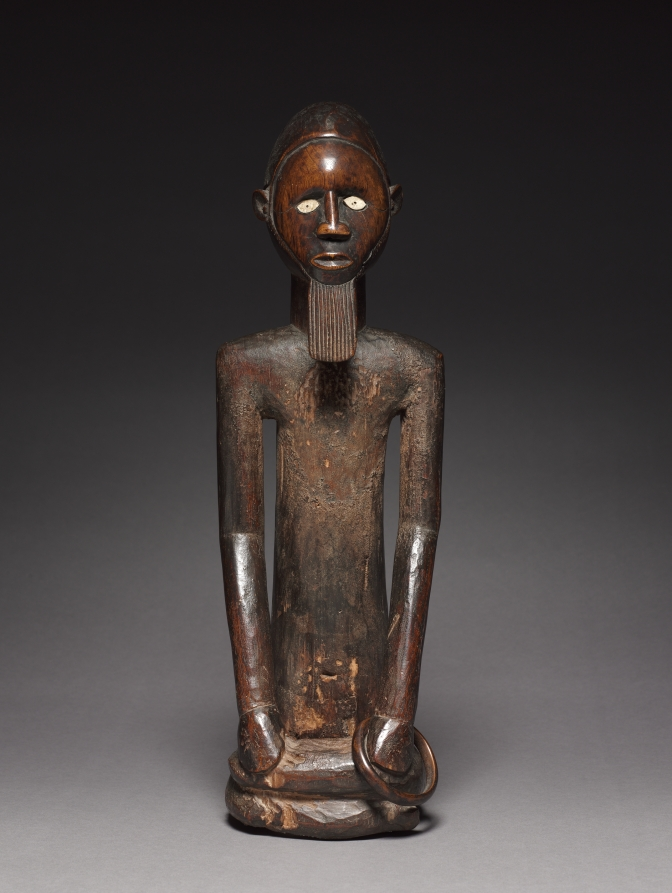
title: Male Figure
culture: Africa, Central Africa, Republic of the Congo, Beembe-style maker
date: late 1800s-early 1900s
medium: Wood, ceramic or Formica, copper alloy, and iron alloy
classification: Sculpture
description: This sculpture played a role in ancestral worship among the Beembe people. Ancestors are held in high regard among the Beembe, and this figure is thought to represent an idealized form of a deceased individual within the ethnic group. The object is one of only two seated male Beembe figures of this size in Western institutions.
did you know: This figure is considered “monumental” as most other types of Beembe figures measure about 15 centimeters tall.